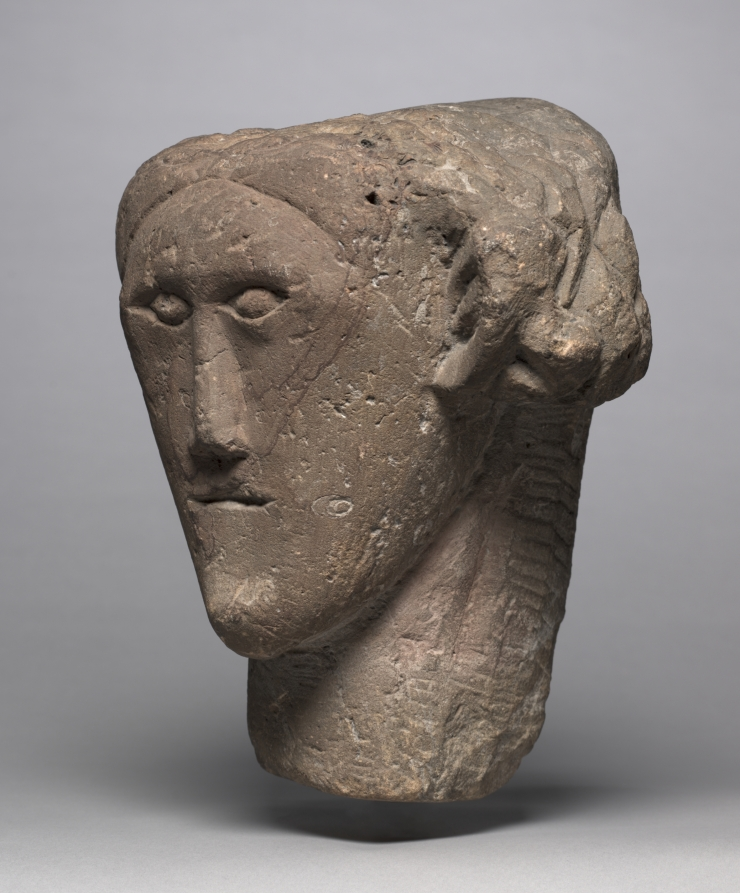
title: Celtic Head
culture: Northern England (Romano-British), Migration period, 2nd-3rd centuries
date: 100–300 CE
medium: sandstone with traces of original red paint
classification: Sculpture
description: This stone head has never been attached to a torso. It is known from ancient literary sources that the Celts, who originally occupied most of northern Europe from Hungary to the British Isles, practiced ritualistic veneration of the human head. For the Celts, the human head represented the seat of mankind’s magical energy. Stone heads similar to this one have survived in large numbers, especially in the upland regions of northern England (the Pennines, the Peak District, and Cumbria) where this one was undoubtedly made by British Celts during the Roman occupation. Such stone heads were probably placed in religious shrines or grottos generally associated with springs, well heads, or natural landmarks for ritual veneration.